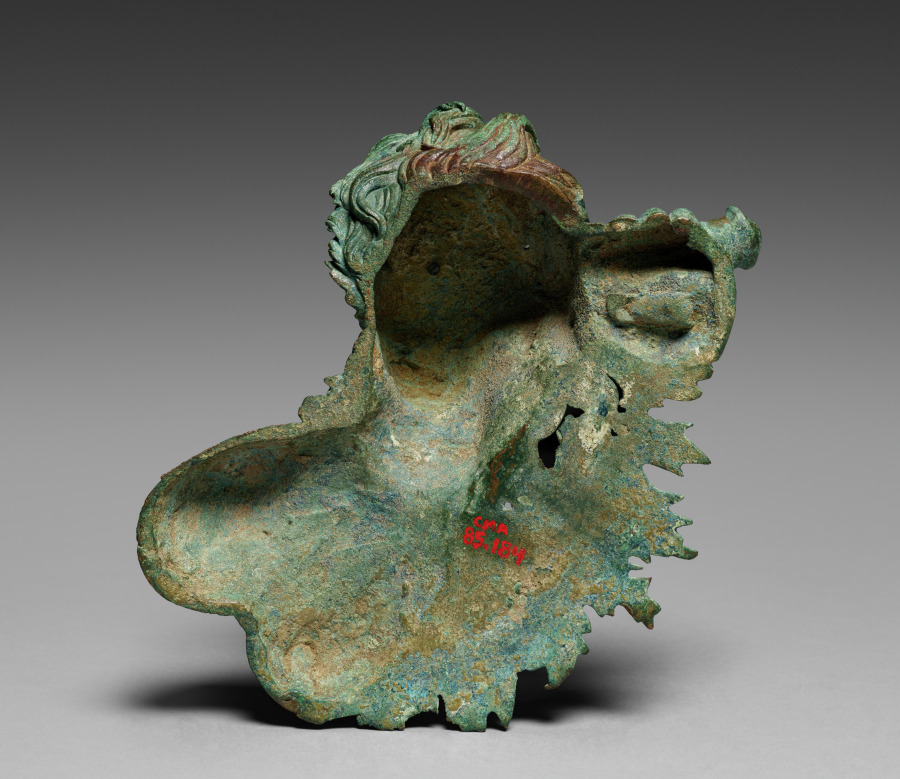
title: Tritoness or Scylla Relief Applique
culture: Greece, Hellenistic period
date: late 200s BCE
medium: bronze with copper inlays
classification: Metalwork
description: The seaweed garment, finned gills, and webbed ears give this female bust appliqué all the hallmarks of an ocean dweller. She may be a Tritoness, a minor goddess of the sea and the female counterpart to the more common Triton. However, her intense gaze and raised arm clutching perhaps the hilt of a sword suggest she may be Scylla, a sea monster that first appears in Homer’s Odyssey. Without the Tritoness’s fishtail or Scylla’s lower body made of dogs’ heads, it is difficult to differentiate. Certain features are highlighted with a copper inlay such as the lips, eyes, and gills.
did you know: Mythological sea creatures became popular metal vessel decorations around the 2nd-century BCE.